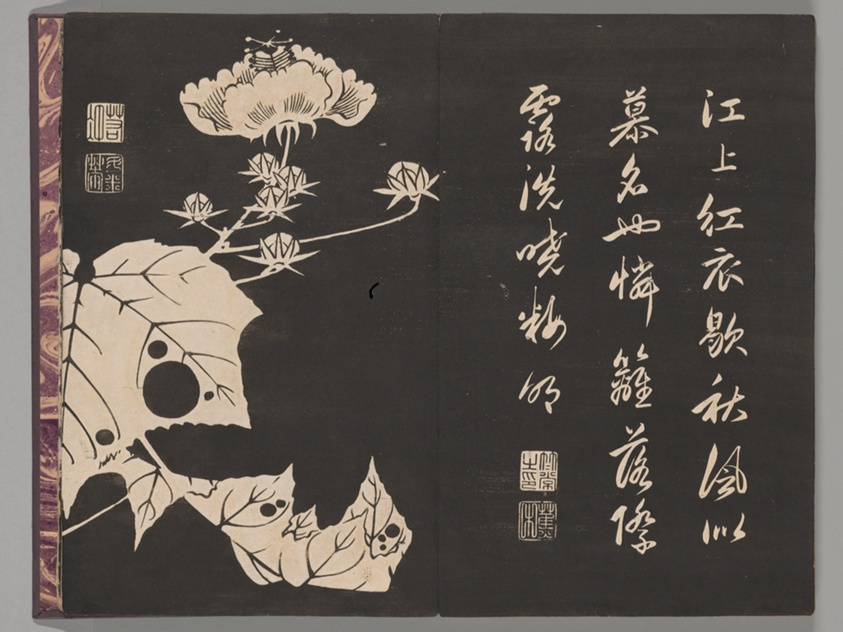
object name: Book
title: Soken sekisatsu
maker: Ito Jakuchu (Japanese, 1716-1800)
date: 1767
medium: Woodblock printed book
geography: Japan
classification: book